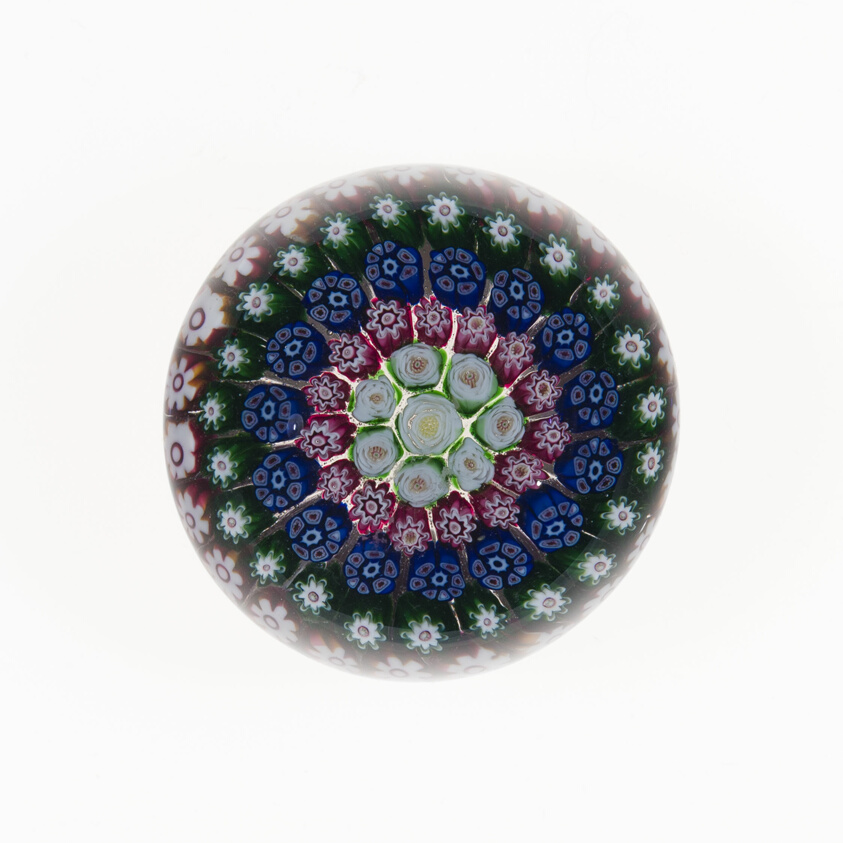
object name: Glass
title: Paperweight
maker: Clichy Glassworks (Cristalleries de Clichy); Clichy, France, 1837-1885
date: c. 1845/60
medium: Glass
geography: France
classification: paperweight; glass